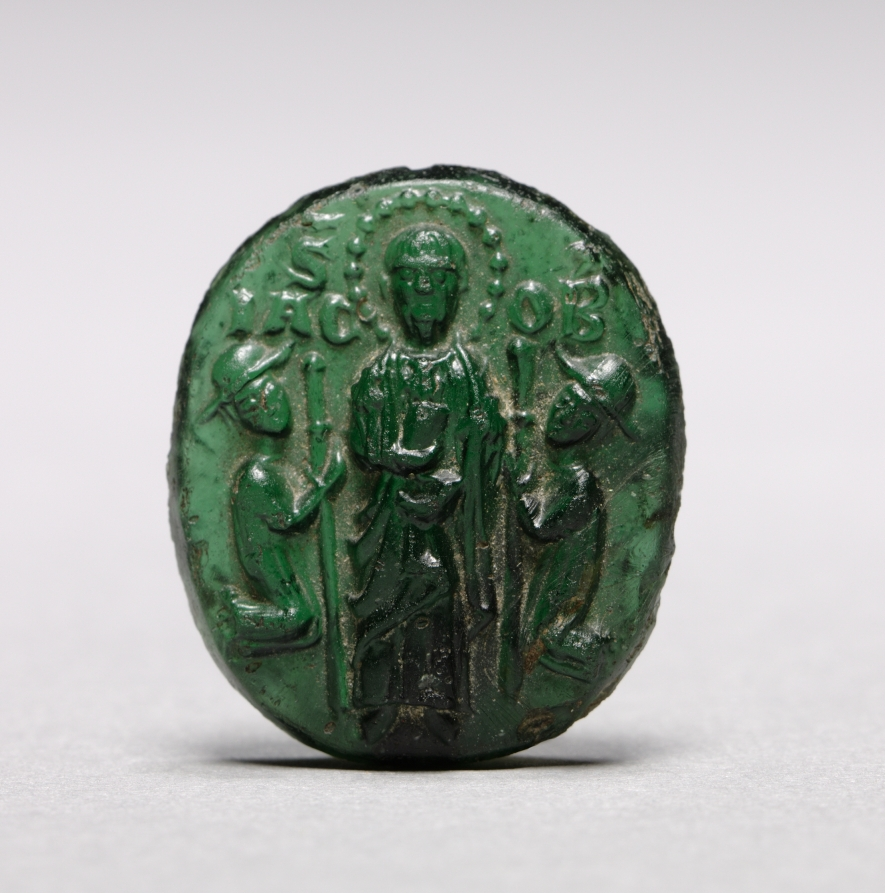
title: Devotional Badge with Saint James Flanked by Two Kneeling Pilgrims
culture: Italy, Venice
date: c. 1200–1250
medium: molded green glass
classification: Glass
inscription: inscribed: S Iacob.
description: In addition to vessels, the glass kilns of Venice produced some devotional badges such as this one. These small objects may have been collected by pilgrims as mementos. This example probably recalls a journey to Santiago da Compostella in distant Spain, one of the greatest medieval pilgrimage destinations. Thought to imitate more valuable carved gems, these glass-plate medallions were made in large quantity by pressing a mold over opaque or transparent molten glass.